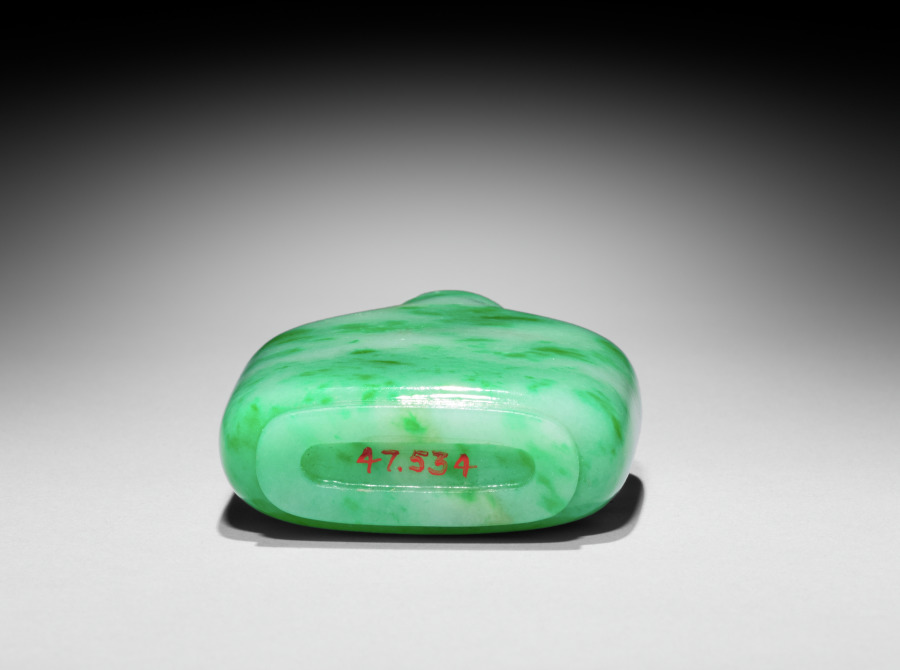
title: Snuff Bottle with Stopper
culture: China, Qing dynasty (1644-1911)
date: 1800s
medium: jade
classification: Jade